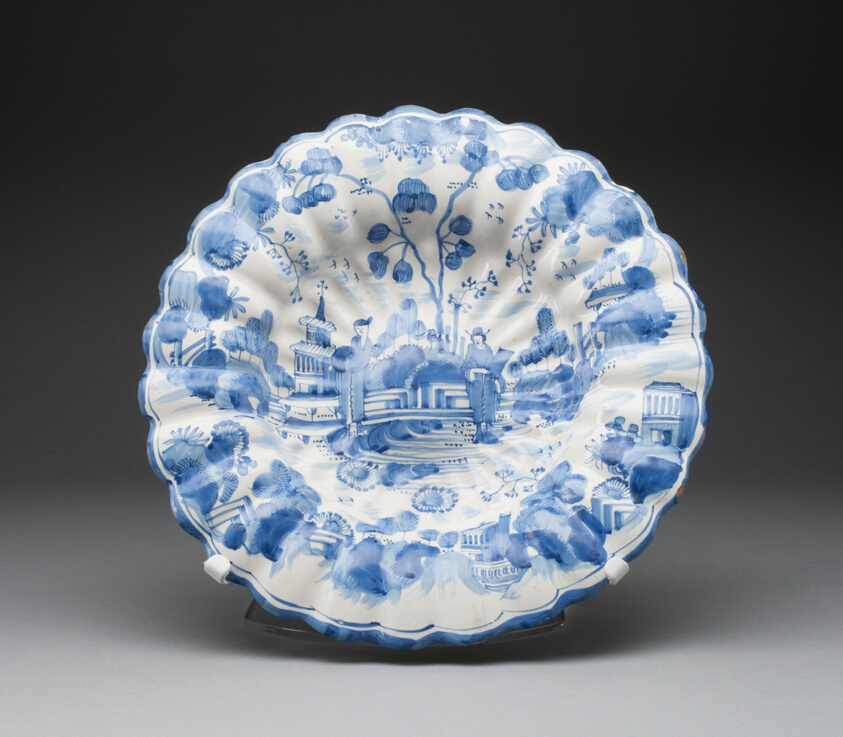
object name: Ceramics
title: Plate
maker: Germany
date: 18th century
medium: Tin-glazed earthenware (faience)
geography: Germany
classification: plate (general, dish); dish (vessel); european decorative arts; ceramics